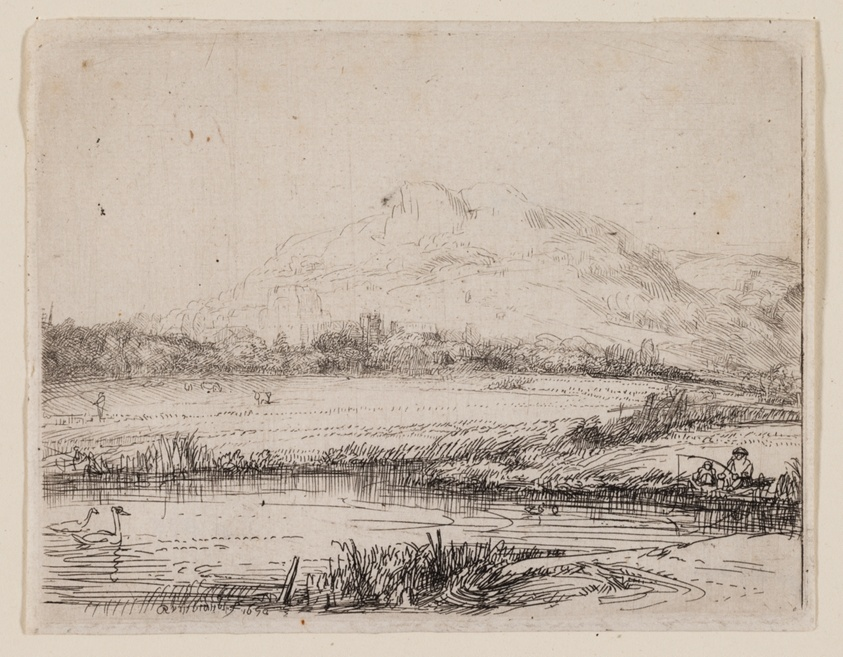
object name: Print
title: Canal with an Angler and Two Swans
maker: Rembrandt van Rijn (Dutch, 1606-1669)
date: 1650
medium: Etching and drypoint on off-white paper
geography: Holland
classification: etching; print; prints and drawing; paper; drypoint